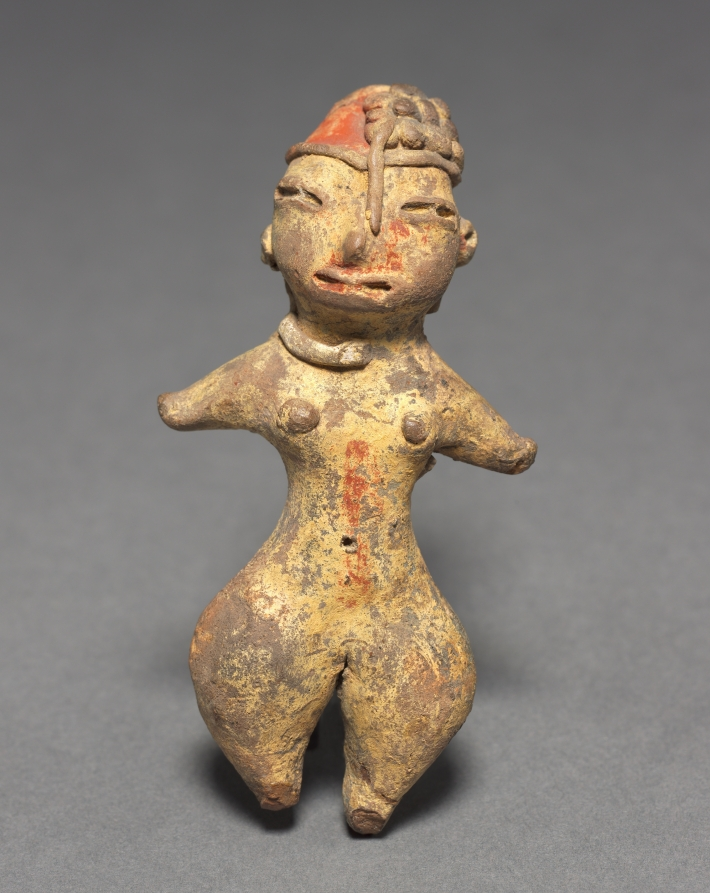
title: Standing Female Figurine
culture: Mesoamerica, Central Mexico, Tlatilco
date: 1200–400 BCE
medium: ceramic with pigment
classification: Ceramic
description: This figurine represents the best-known type found in graves at Tlatilco, an early farming village on the outskirts of Mexico City. The type is known as the “pretty lady” after its representatives’ sweet faces, fancy hairstyles, pinched waists, and flaring hips and thighs.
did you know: This figurine represents the best-known type found in graves at Tlatilco, an early farming village.